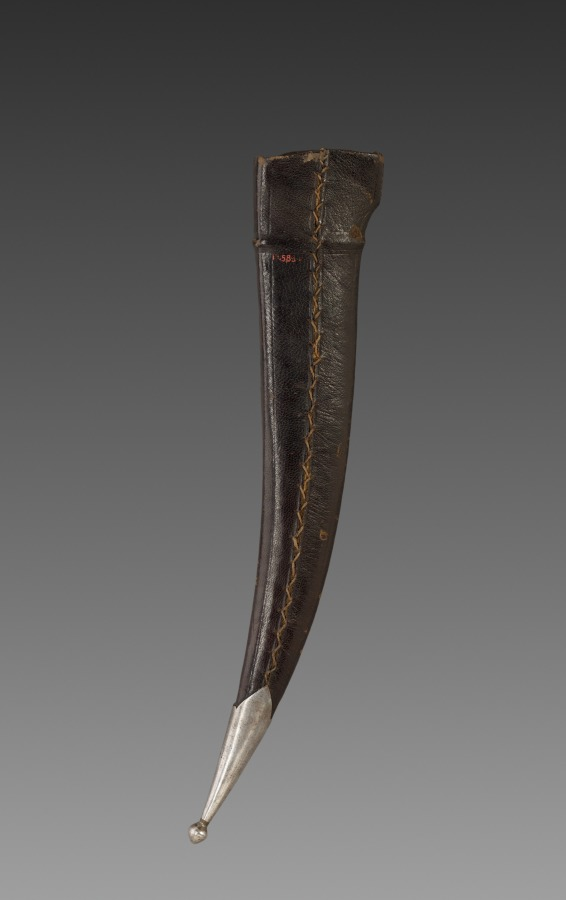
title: Scabbard for Dagger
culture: India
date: 1800s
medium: bronze and jade with leather and silver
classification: Arms and Armor